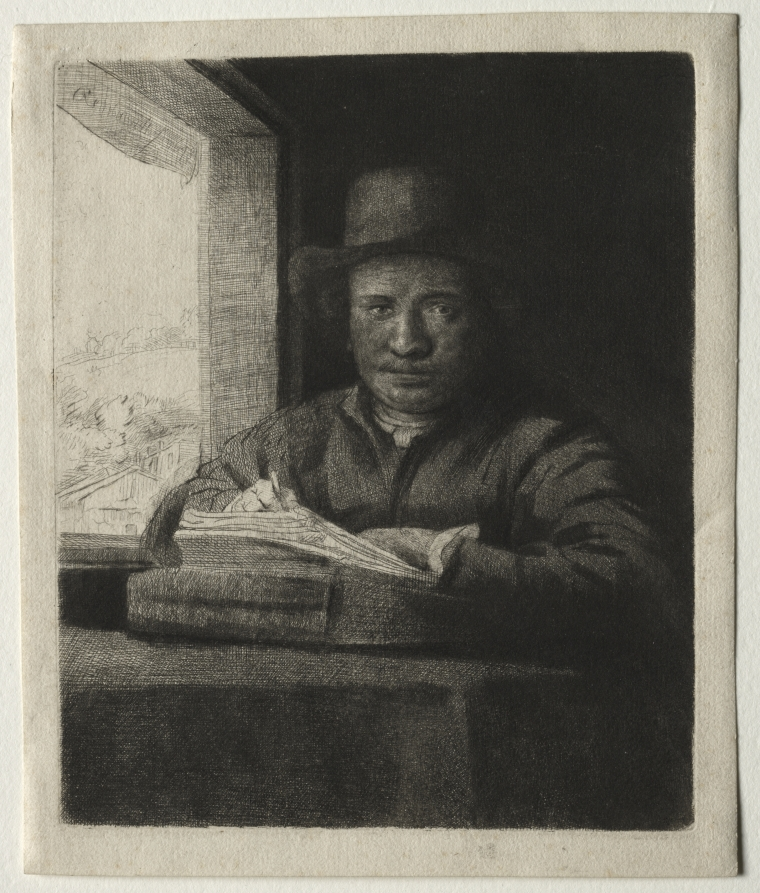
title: Self-Portrait Drawing at a Window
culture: Netherlands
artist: Rembrandt van Rijn (Dutch, 1606–1669)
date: 1648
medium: etching, drypoint, and engraving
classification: Print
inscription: upper right, in plate: Rembrandt. f 1648 ; VERSO, lower left, in graphite: [illegible] ; lower left, in graphite: i8 ; lower left, in graphite: VVD ; lower center, in graphite: B. 22 IX ;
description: In this late self-portrait—one of more than 80 created by Rembrandt van Rijn—the artist shows himself informally posed at a studio window. He uses a needle to draw into a copper etching plate and gazes directly at the viewer as if interrupted in the process of creating a work of art. The window provides the light required to complete this task, but it also reveals the isolation of art making by juxtaposing Rembrandt’s interior space with the expansive landscape and external world from which he has sequestered himself.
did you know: In order to show himself with the direct gaze that characterizes this self-portrait, Rembrandt translated a view seen while studying himself in a mirror.